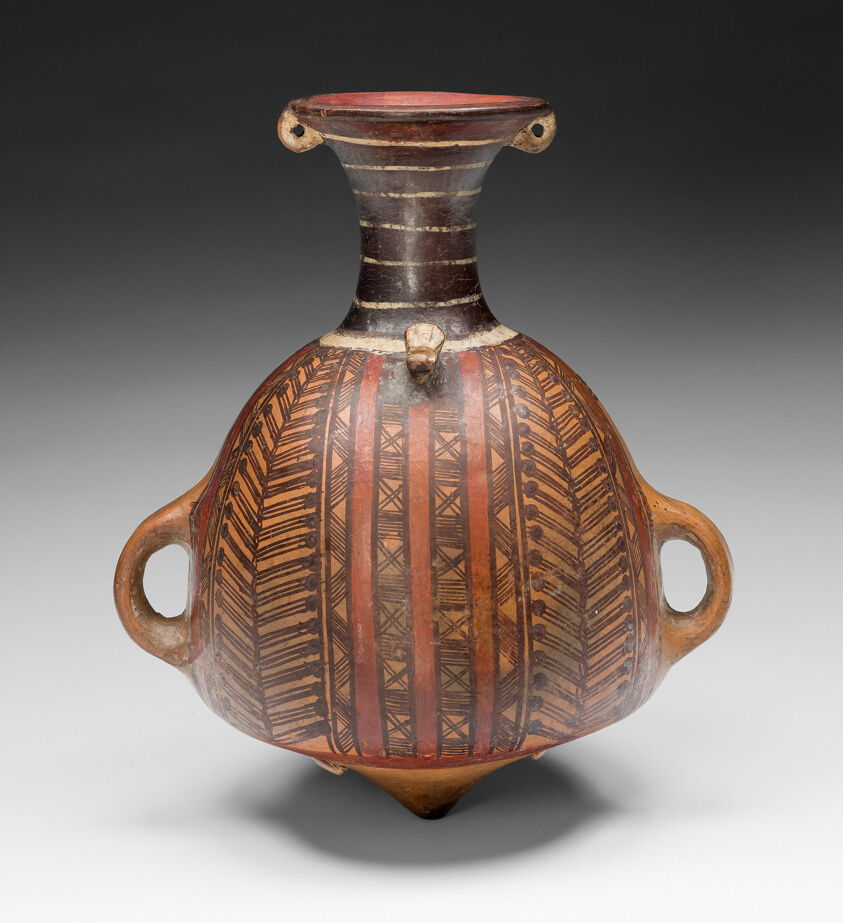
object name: Vessel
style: inca, late intermediate period, Pre-Columbian, americas, andes, Arts of the Americas, andean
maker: Inca (South coast or southern highlands, Peru)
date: 1450–1532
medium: Ceramic and pigment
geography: Southern Peru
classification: earthenware; ceramics; vessel; art of the americas; miniature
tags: ritual objects, offering, drinking